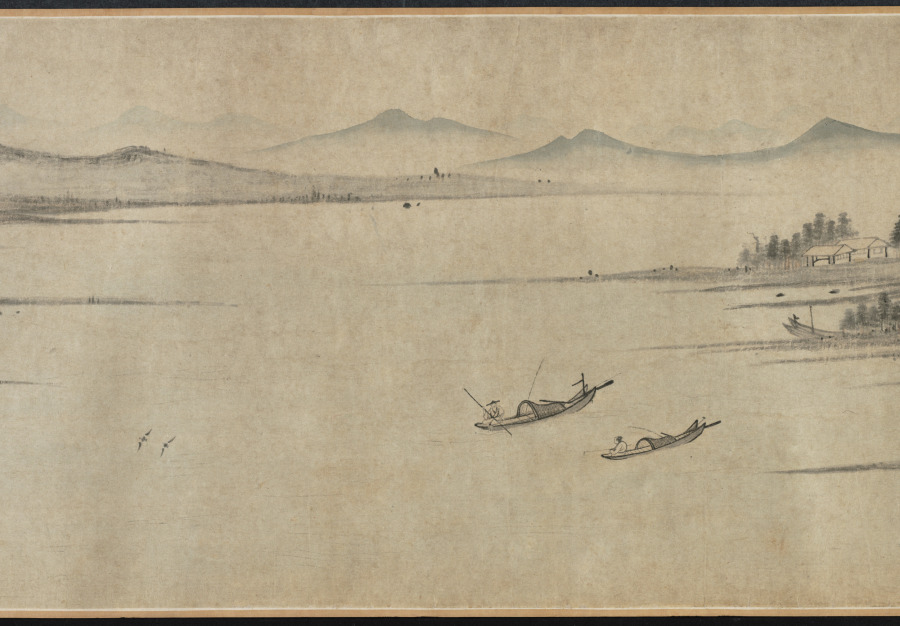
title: Mt. Taibo in the Style of Wang Meng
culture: China, Ming dynasty (1368–1644)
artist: Du Qiong (Chinese, 1396–1474)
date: 1442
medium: handscroll; ink and light color on paper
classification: Painting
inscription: Artist's inscription, signature, and 11 seals: [1 seal] Tung-yüan chai. Huang-ho-shan-ch'iao [Wang Meng] painted a painted called T'ai-po Mountain. Its brushwork is superior and admirable, which is very close to Yu-ch'en [Wang Wei, 699-759]. The cleverness of its composition, the maple groves and rustic temples, the inaccessible ravines and autumnal plateaus, the periolous peaks and strange rocks, etc., all seem to be so natural. The paper is only a little over eight feet, but the landscape has the range of a thousand miles. Once you open and note the contents, it is as if one were roaming among the mountain peaks enveloped in mist and clouds, and forgot the dusty world. When I first saw this, I was so mixed with excitement and joy that I could not take my hands off the painting. So I put it on the table, and tried my best to imitate it, forgetting sleeping and eating for about three months before it was completed. Although I do not dare to tread in the footsteps of Huang-ho shan ch'iao, I took great pains to capture his spirit in composition and colors. I do not know whether it would pass the judgment of the experts. On the fifteenth day of the fifth month, the seventh year of the Cheng-t'ung year [1442], inscribed by Tung-yüan, Tu Chiung. [2 seals] Yung-chia; Ching-chieh ming-men. [8 seals on painting] Tung-yüan chai; Ching-chieh ming-men; Yung-chia; Tu Ch'iung yin; Tung-yüan (repeated 5 times). trans. WKH/LYSL 3 colophons and 7 additional seals: 1 colophon and 2 seals of Chou Ting (1401-1487); 1 colophon and 2 seals of Wu K'uan (1435-1504); 1 colophon, dated 1655, and 2 seals of Lan Ying (1585-after 1664).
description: When a Chinese painter "imitated" a painting by a past master, the intention was never to produce an exact copy. Du Qiong, the Ming painter from Suzhou, is a case in point. The painting style of this handscroll is actually closer to that of Huang Gongwang (1269–1354) than to the style of Wang Meng (about 1301–1385). Both masters were active during the previous dynasty and are among the so-called Four Great Masters of the Yuan dynasty (1279–1368). In this painting, the interplay of styles, including Du Qiong's own, contribute to an inner dimension that is more than visual. Mt. Taibo is located in the province of Zhejiang and is known for its scenic beauty. In this scroll, however, it is not depicted literally. The image is an ideal representation of mountains in southeastern China.